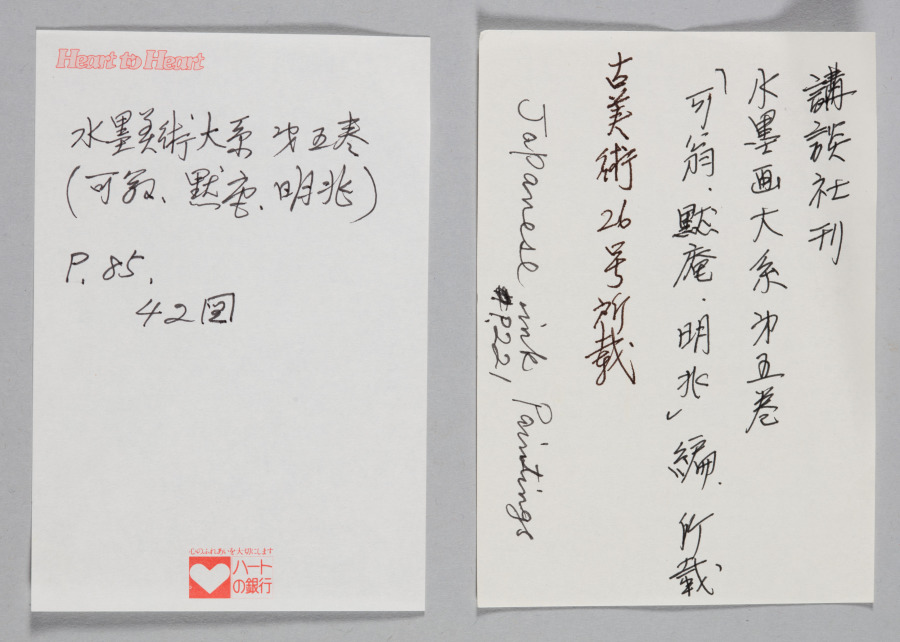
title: Reeds and Geese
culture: Japan, Kamakura period (1185–1333)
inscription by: Yishan Yining [Issan Ichinei] (Chinese, 1247–1317)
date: 1314–17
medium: hanging scroll; ink on paper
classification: Painting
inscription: signed: Issan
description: Reeds and geese has been a common pairing in Chinese literary and visual culture for many centuries. This painting presents the contribution of a Japanese amateur painter, almost certainly a Zen Buddhist monk, to Japan’s fledgling efforts to add the theme to its own cultural vocabulary in the early 1300s. As was customary at the time in Japan, the painter did not sign or seal his work; the inscription, a poem added to the painting by the eminent émigré monk Yishan Yining, along with his signature and seal, was of far greater cultural value. Today, the modestly sized painting has tremendous significance as one of the earliest surviving examples of Japanese ink paintings with reeds and geese.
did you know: Tokyo National Museum owns a copy of this painting made by Kano Gyokusen (1796–1864) when he was 14 years old.